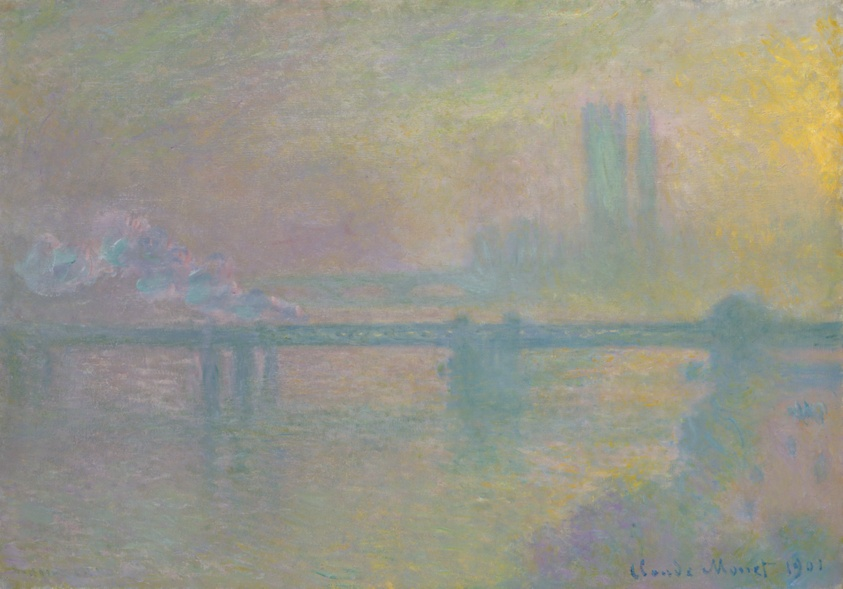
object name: Painting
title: Charing Cross Bridge, London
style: Impressionism, 20th Century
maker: Claude Monet (French, 1840–1926)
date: 1901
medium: Oil on canvas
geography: France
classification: painting; paint; oil paintings (visual works); oil on canvas; french; modern and contemporary art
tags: landscapes, bridge, England, london, building, buildings, structure, river, light, weather/seasons, water, urban life, Century of Progress, world's fairs, Chicago World's Fairs